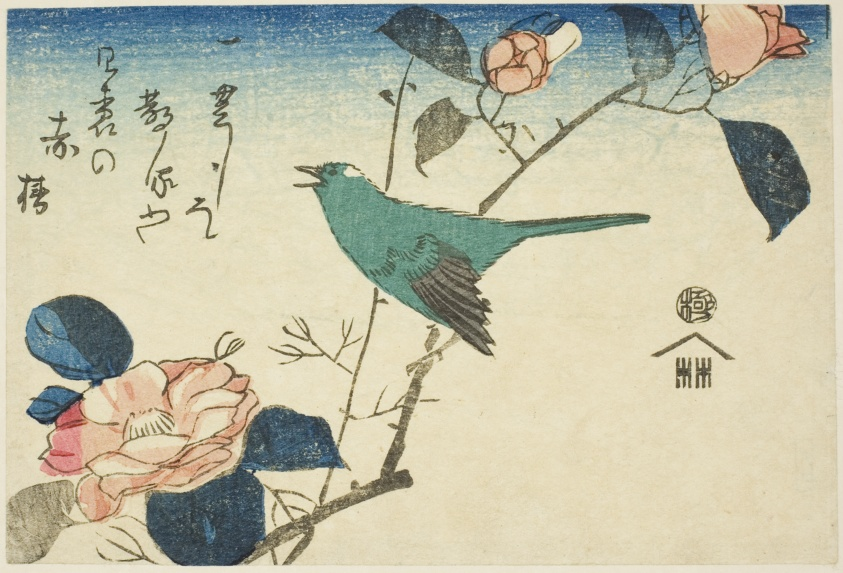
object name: Print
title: Bush warbler and camellia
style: Japanese (culture or style)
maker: Utagawa Hiroshige 歌川 広重; Japanese, 1797-1858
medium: Color woodblock print; yotsugiriban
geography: Japan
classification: woodblock print; print; asian art